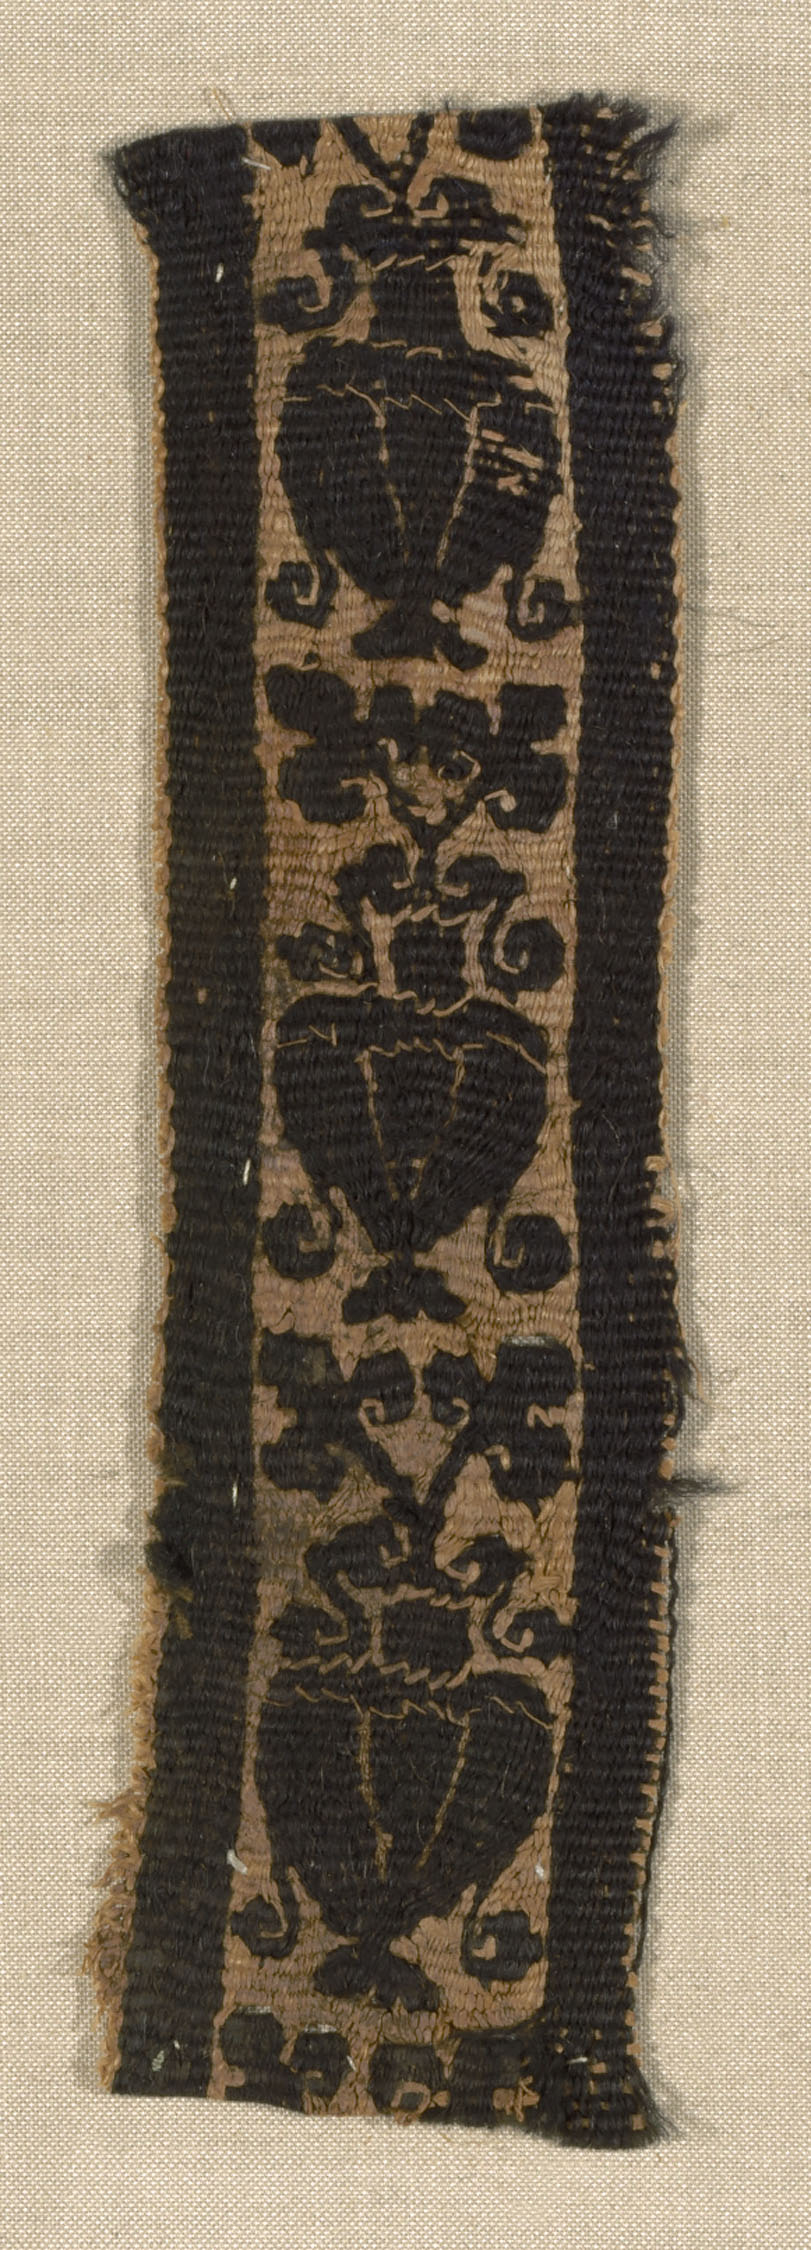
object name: Textile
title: Fragment (Border)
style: roman period (egyptian)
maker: Coptic (Egypt, Akhmin)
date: Roman period (30 B.C.– 641 A.D.), 4th/5th century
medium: Linen and wool, slit tapestry weave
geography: Egypt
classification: textile; weaving